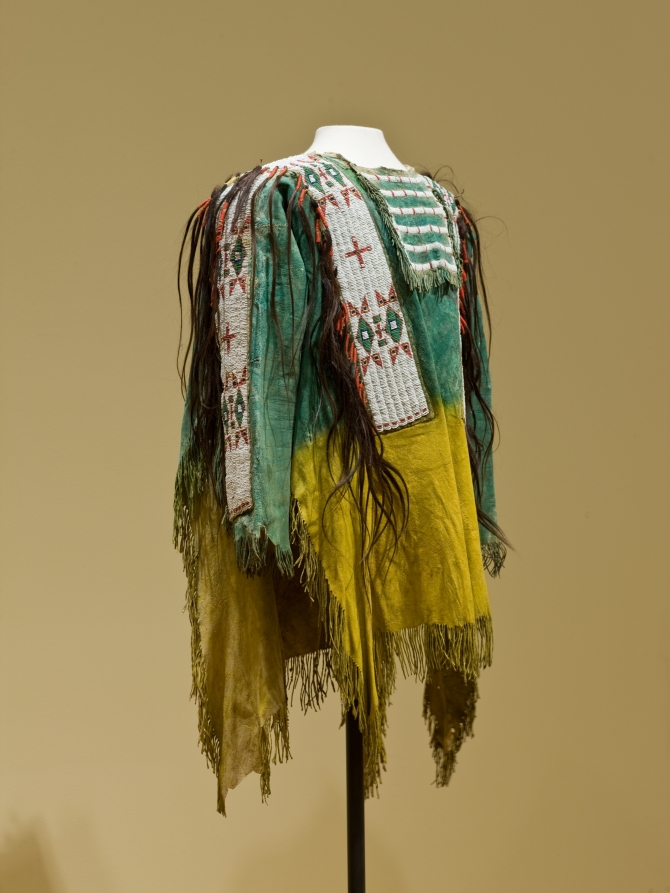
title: Hide Shirt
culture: America, Native North American, Central Plains, Lakota Sioux, 19th century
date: c. 1890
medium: hide, pigment, glass beads, human hair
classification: Textile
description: Traditionally, only Lakota (Sioux) head chiefs had the right to wear painted shirts, an honor they earned through sacrifice and bravery but lost by failing in their responsibilities. By the time this example was created, European Americans had confined the Lakota to reservations, and painted shirts had become the privilege of battle veterans rather than of active warriors. Family members probably donated the locks of hair, each representing a war exploit.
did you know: Only Lakota (Sioux) chiefs had the right to wear painted shirts, an honor they earned through bravery.